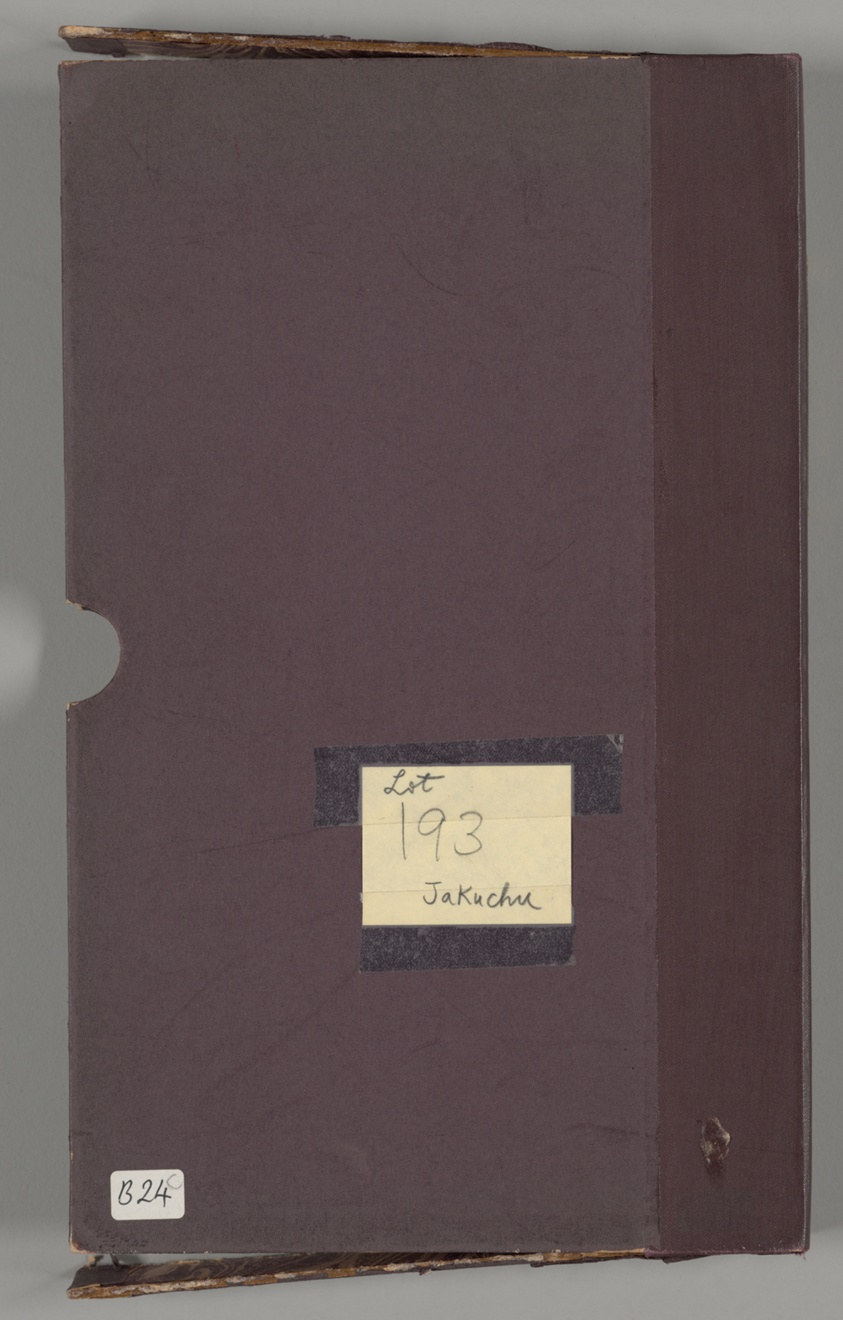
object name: Book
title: Soken sekisatsu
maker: Ito Jakuchu (Japanese, 1716-1800)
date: 1767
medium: Woodblock printed book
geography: Japan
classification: book